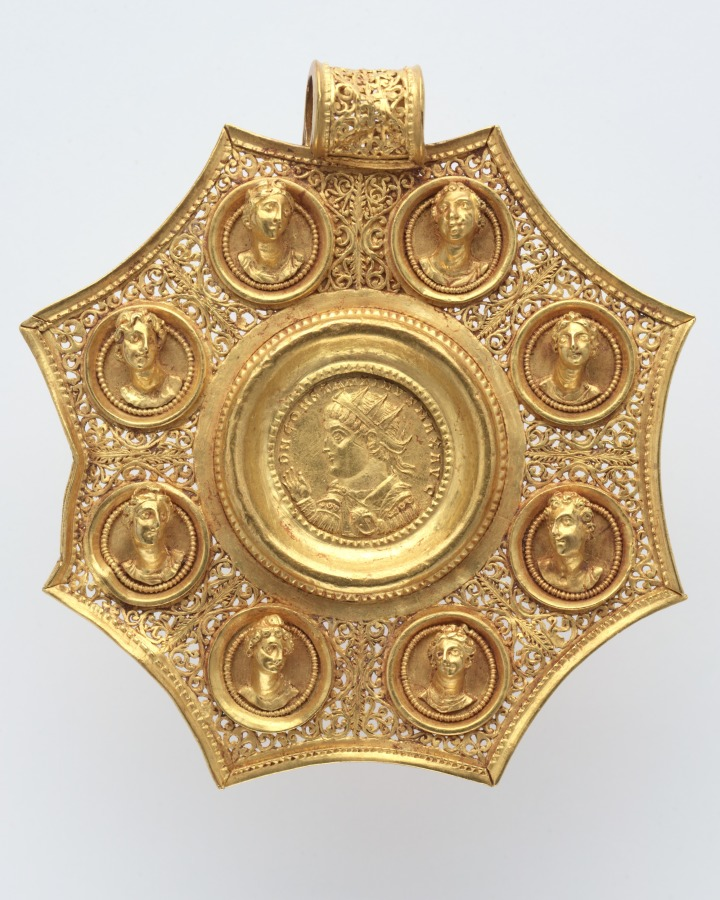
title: Octagonal Pendant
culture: Byzantium, Late Roman, Eastern Mediterranean, (probably Sirium or Nicomedia), Byzantine period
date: 324–26 CE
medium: gold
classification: Jewelry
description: Mounted at the center of this octagonal pendant is a rare coin issued by Constantine the Great, the Roman Empire’s first Christian emperor. Constantine’s portrait appears on the coin’s front, those of two of his sons on the back. Constantine’s image is surrounded by male and female busts, some of which are mythological figures. The pendant once formed the centerpiece of a sumptuous gold necklace, likely a gift for a high-ranking court official or member of the imperial family.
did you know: Precious Byzantine coins, such as the one in this pendant, were mounted as jewelry and bestowed upon court officials as a special honor. They signified loyalty to the emperor and were often passed down as family heirlooms. Does your family have special objects that have been preserved from generation to generation?